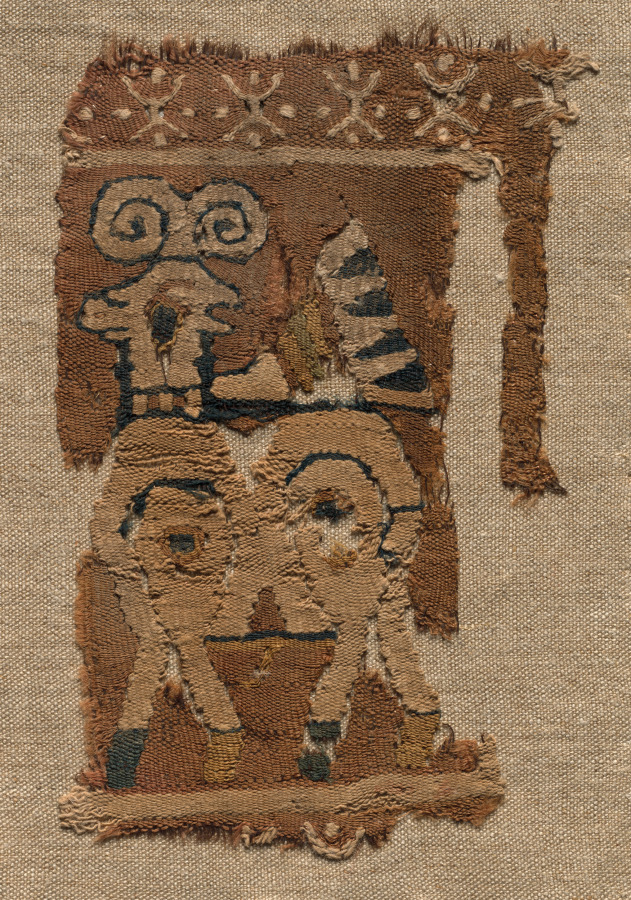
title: Fragment (from a Garment ?)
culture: Iran or Iraq, Abbasid period (750–1258)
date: late 700s–early 800s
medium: goat hair, wool, and cotton: tapestry (originally inwoven in tabby ground)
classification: Textile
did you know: The fragment's design consists of a single stylized ram wearing a pearled collar to which is attached a large ribbon that floats over the ram's back.